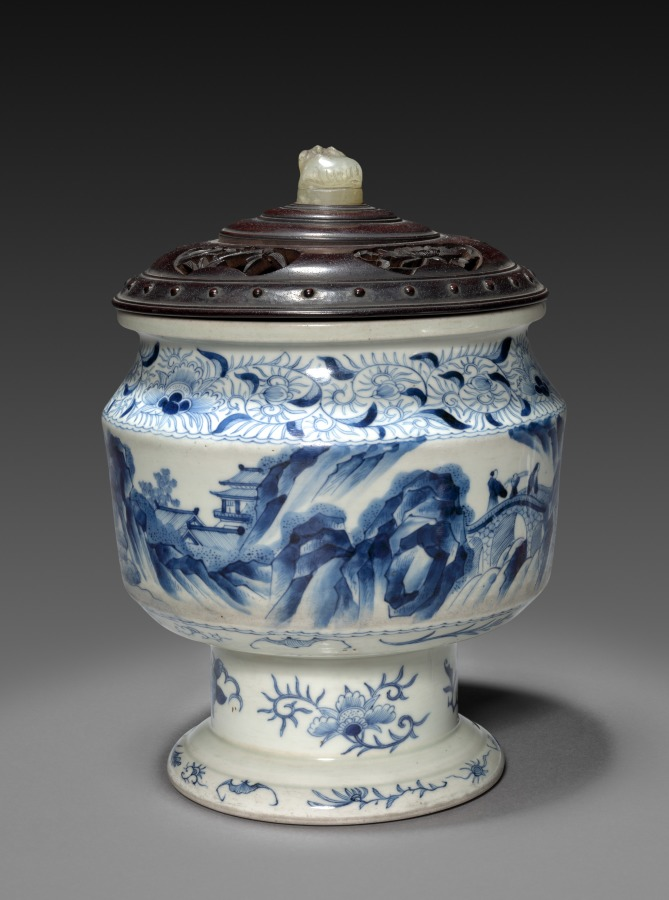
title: Jar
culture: Japan, Edo period (1615–1868)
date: early to mid-1800s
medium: porcelain with underglaze blue; teak and carved stone (lid)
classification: Ceramic